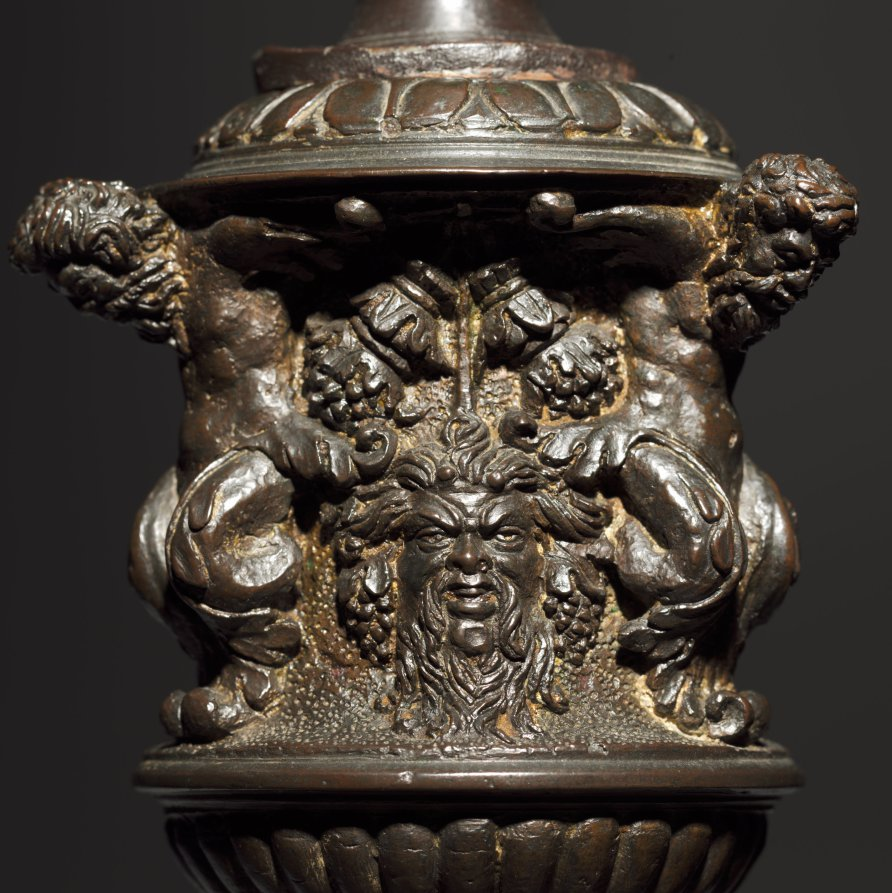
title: Paschal Candlestick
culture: Northern Italy, possibly Padua, 16th century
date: c. 1525–1550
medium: bronze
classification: Sculpture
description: In Roman Catholic practice, a large candlestick holds the Paschal Candle, blessed and lit for the first time on Easter eve, then used on significant occasions throughout the year. Despite its religious function, the decorations here are entirely secular-ranging from panthers and bound satyrs to the heads of raptors and goats. These elements derive from ancient Roman sculpture and were especially popular among intellectuals in northern Italy, who were actively exploring connections among pagan traditions, ancient philosophy, and Christianity.